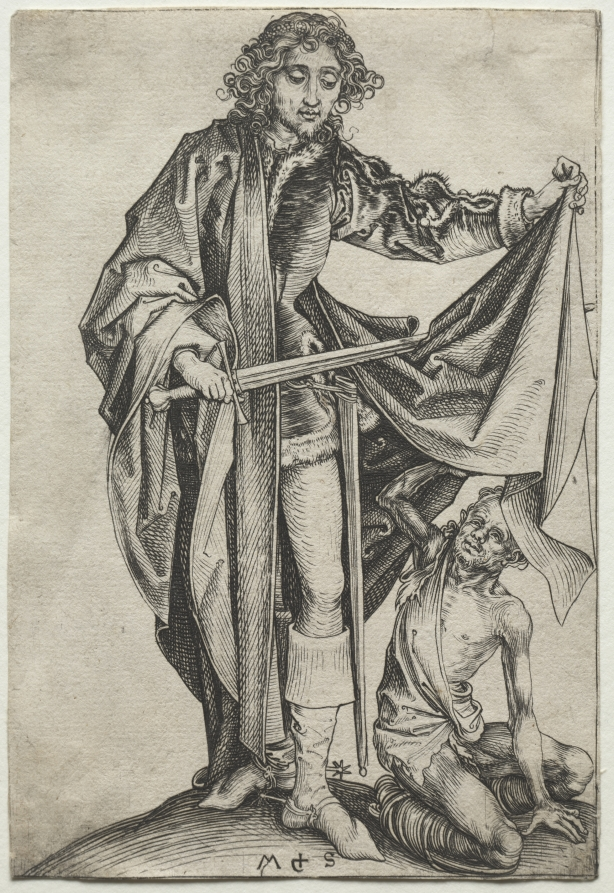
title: St. Martin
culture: Germany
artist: Martin Schongauer (German, c. 1450–1491)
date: 1485–90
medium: engraving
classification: Print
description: Martin Schongauer was among the first artists to work extensively in engraving to create series such as the one depicting the saints. Here, Schongauer portrayed Saint Martin as a handsome youth with curly hair, in the midst of dividing his fur-lined cloak to share with a beggar seated at his feet. According to the legend on the life of Saint Martin, after sharing his cloak with the man, Martin later discovered in a dream that he had actually shared his mantle with Christ. Soon after, Martin was baptized and became the Bishop of Tours.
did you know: Saint Martin was often represented as a knight on a horse; here, Schongauer alluded to the steed by placing a pair of spurs on Martin's boots.